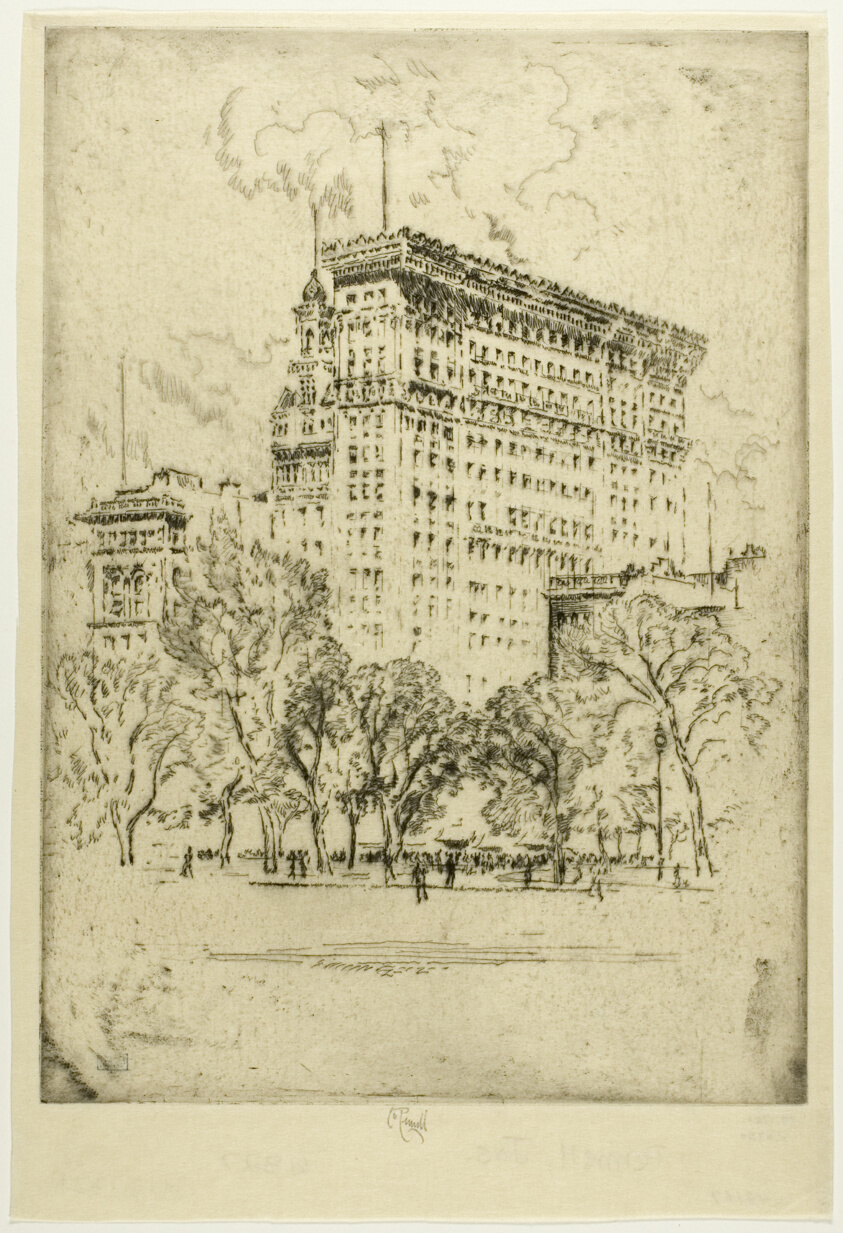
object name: Print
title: Union Square and Bank of Metropolis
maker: Joseph Pennell (American, 1857-1926)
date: 1904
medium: Etching on ivory laid tissue-thin paper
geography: United States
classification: etching; print; prints and drawing